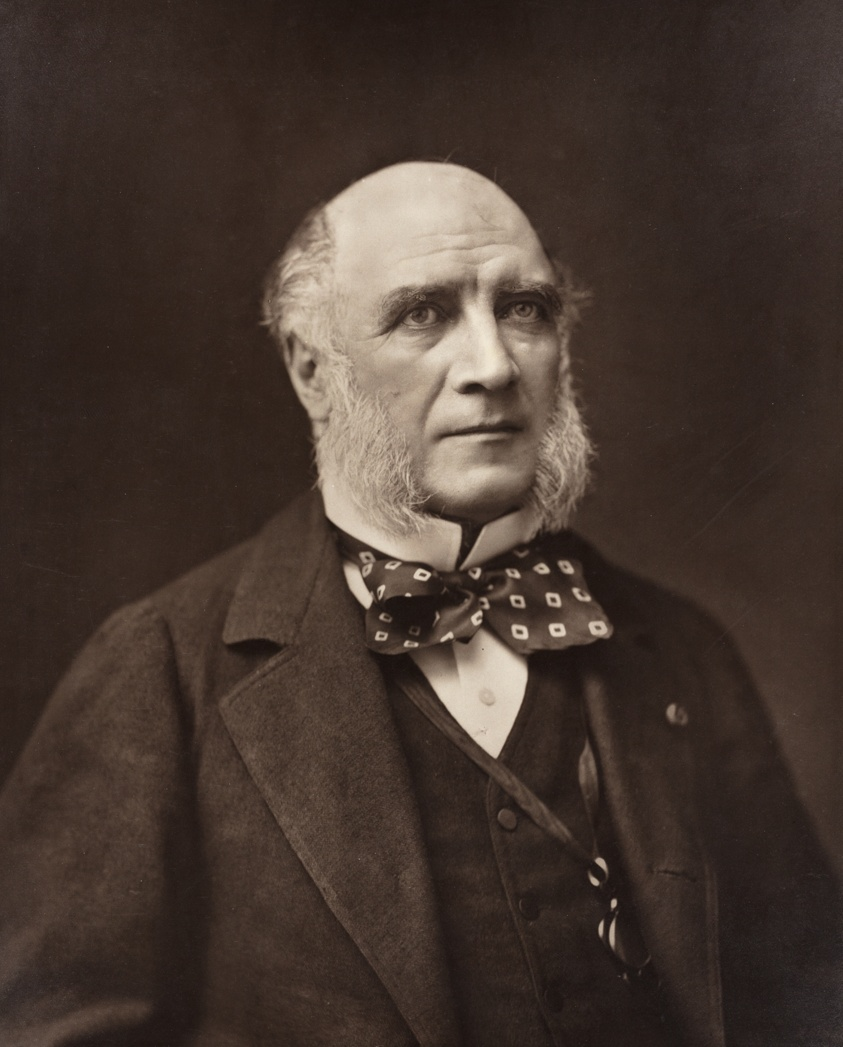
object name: Photograph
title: Élie-Louis, duc Decazes (French statesman and diplomat, 1819-1886)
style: 19th century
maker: Nadar (Gaspard Félix Tournachon) (French, 1820–1910)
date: c. 1853/77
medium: Woodburytype, from the periodical “Galerie Contemporaine Littéraire, Artistique” (1877), volume 2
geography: France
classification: woodburytype; photomechanical process; photography; photograph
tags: Collected by Hugh Edwards, Contemporaine Littéraire